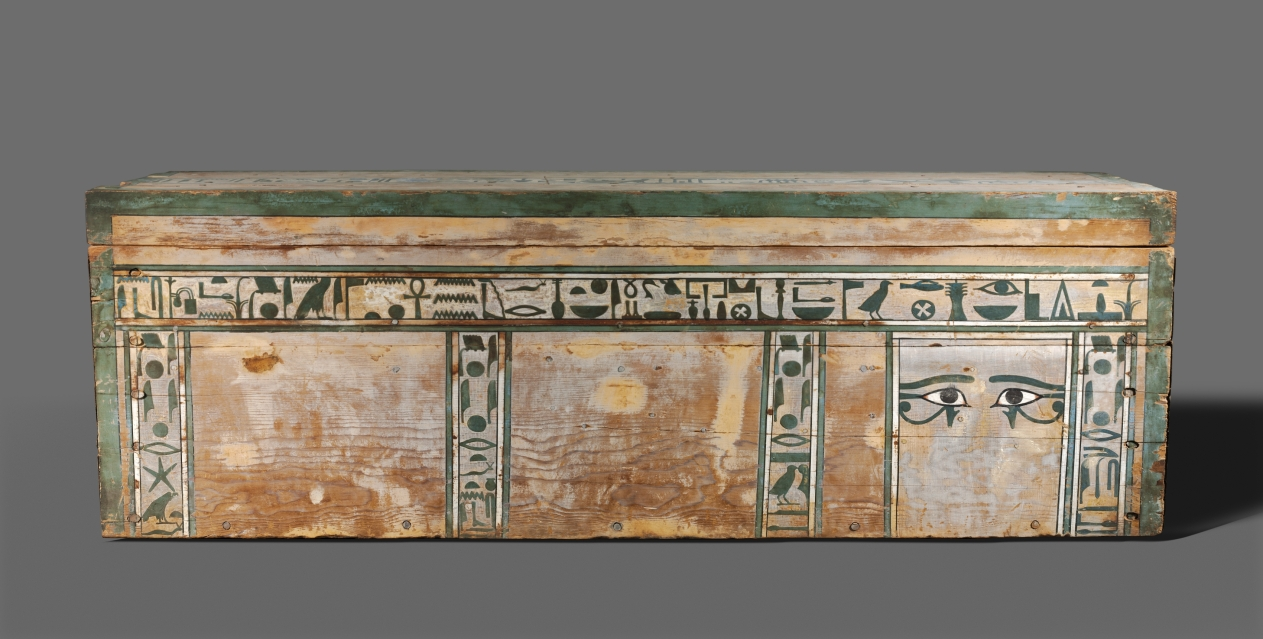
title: Coffin of Senbi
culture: Egypt, Meir, Middle Kingdom, mid-Dynasty 12, reign of Amenemhat II to Sesostris III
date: c. 1918–1859 BCE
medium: gessoed and painted cedar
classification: Funerary Equipment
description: The most common type of coffin during the Middle Kingdom took the shape of a rectangular box with lid. The mummy inside was placed on his left side, facing east, his head behind the two magical eyes. These—in the shape of human eyes, to which have been added the markings of a falcon's head—were supposed to enable him to behold the rising sun, reborn daily. The long horizontal inscriptions are prayers to Anubis (god of embalming) and Osiris (god of the dead) for offerings of food and drink and other items necessary for survival in the afterlife. The short vertical inscriptions place him under the protection of the gods of earth, sky, air, and moisture, as well as various funerary deities.